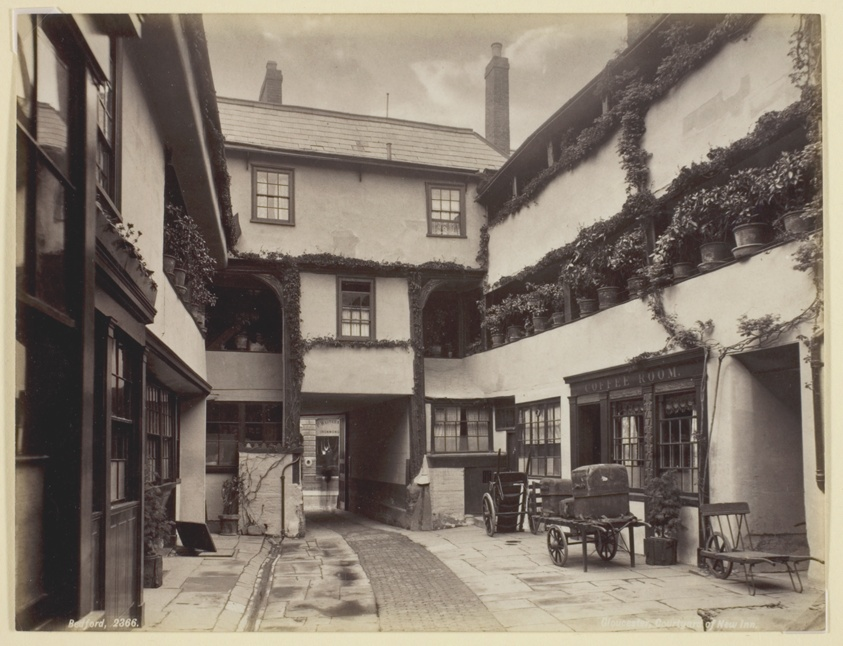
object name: Photograph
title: Gloucester, Courtyard of New Inn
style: 19th century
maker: Francis Bedford (English, 1816–1894)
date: 1860/94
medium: Albumen print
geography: England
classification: albumen silver print; photographic process; photography; photograph